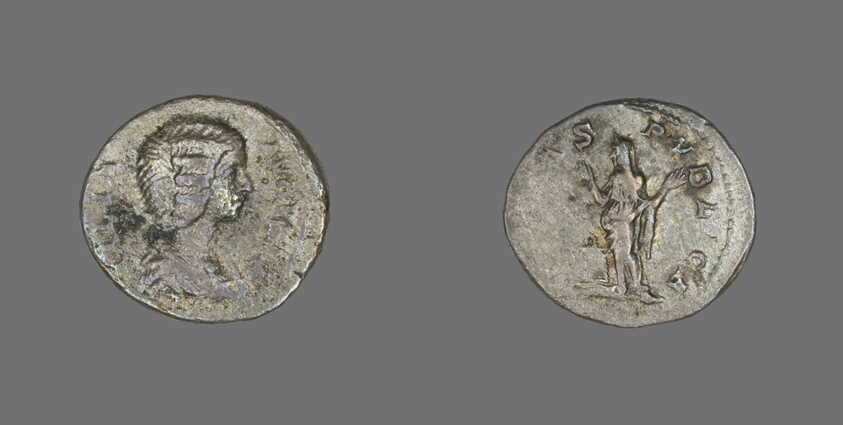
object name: Coin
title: Denarius (Coin) Portraying Empress Julia Domna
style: roman (ancient, style or period)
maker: Roman, minted in Rome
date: 196-211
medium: Silver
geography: Roman Empire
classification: coin; ancient art